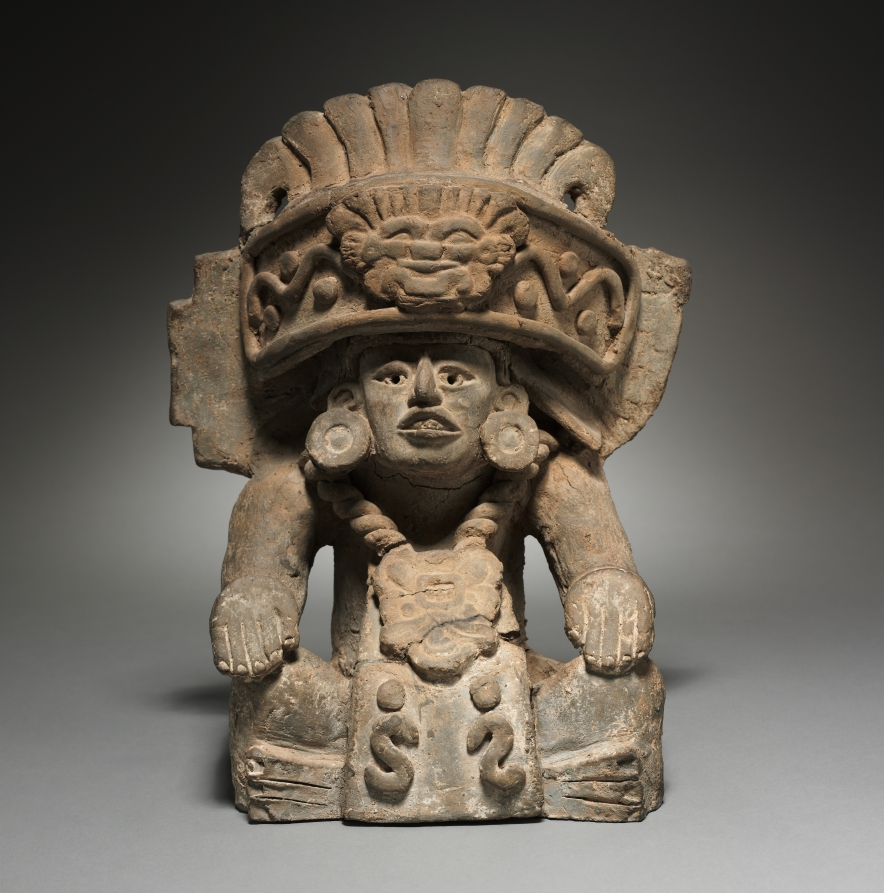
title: Funerary Urn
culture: Mexico, Oaxaca, 5th-6th Century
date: 400s-500s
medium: earthenware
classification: Sculpture